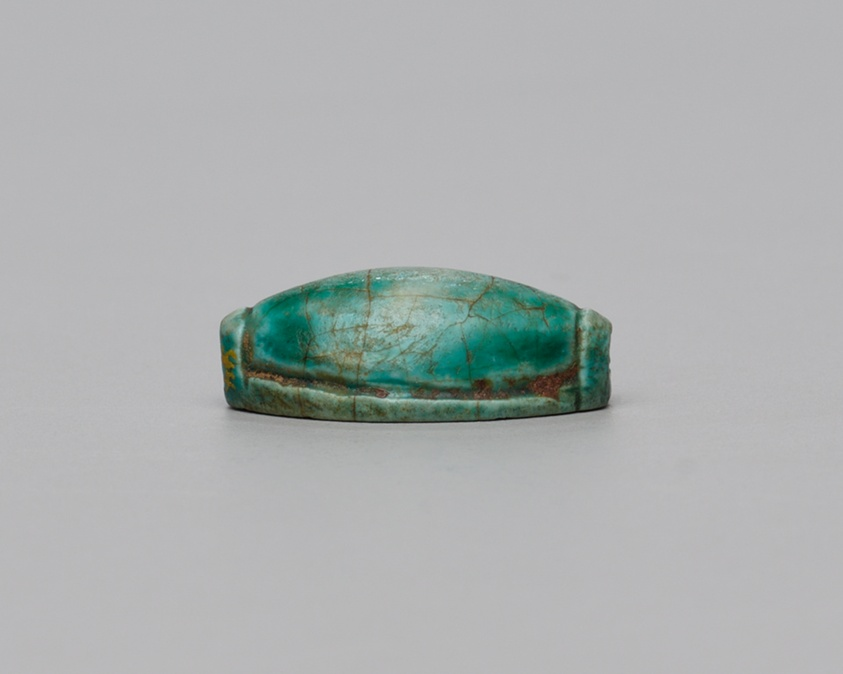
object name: Costume and Accessories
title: Cowroid Amulet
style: new kingdom, ancient, eighteenth dynasty, egyptian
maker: Egyptian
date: New Kingdom, Dynasty 18 (about 1550–1069 BCE)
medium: Glazed steatite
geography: Egypt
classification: amulet; jewelry; ancient art; costume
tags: shells, vessels, floral motifs, Hieroglyphs